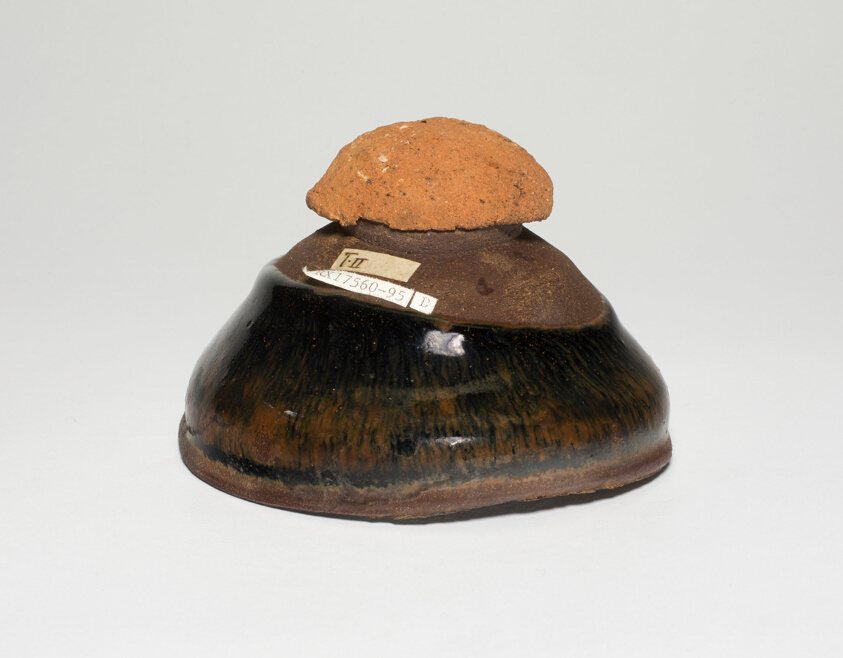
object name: Vessel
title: Fragmentary Bowl, with clay firing cushion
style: Chinese (culture or style)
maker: China, Fujian Province, Jian ware kiln site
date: Song dynasty (960–1279), 12th/13th century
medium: Jian ware; stoneware with "hare's fur" glaze and clay firing cushion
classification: bowl; dish (vessel); ceramics; vessel